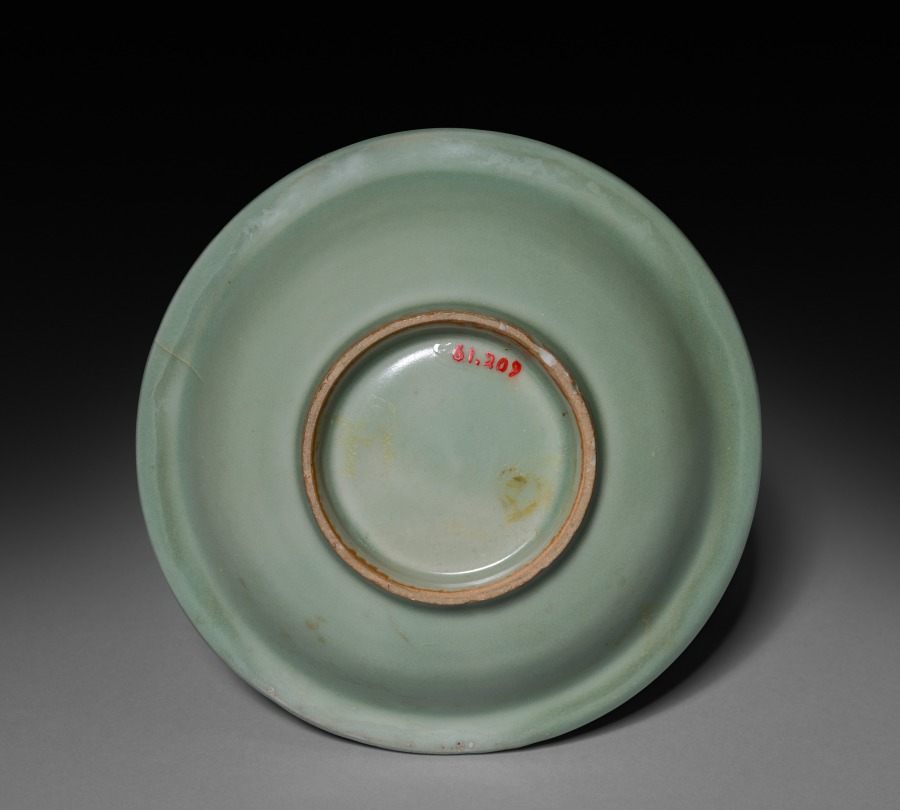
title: Plate: Longquan Ware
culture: China, Southern Song Dynasty (1127-1279) - Yuan Dynasty (1271-1368)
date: 1200s-1300s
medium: glazed porcelain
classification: Ceramic